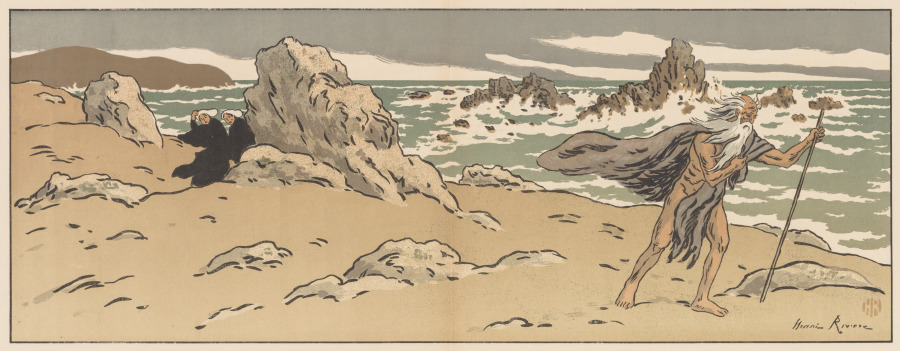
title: The Wandering Jew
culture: France, 19th century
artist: Henri Rivière (French, 1864–1951)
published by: Verneau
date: 1896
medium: color lithograph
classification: Print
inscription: title page is signed, in blue crayon: Henri Rivière